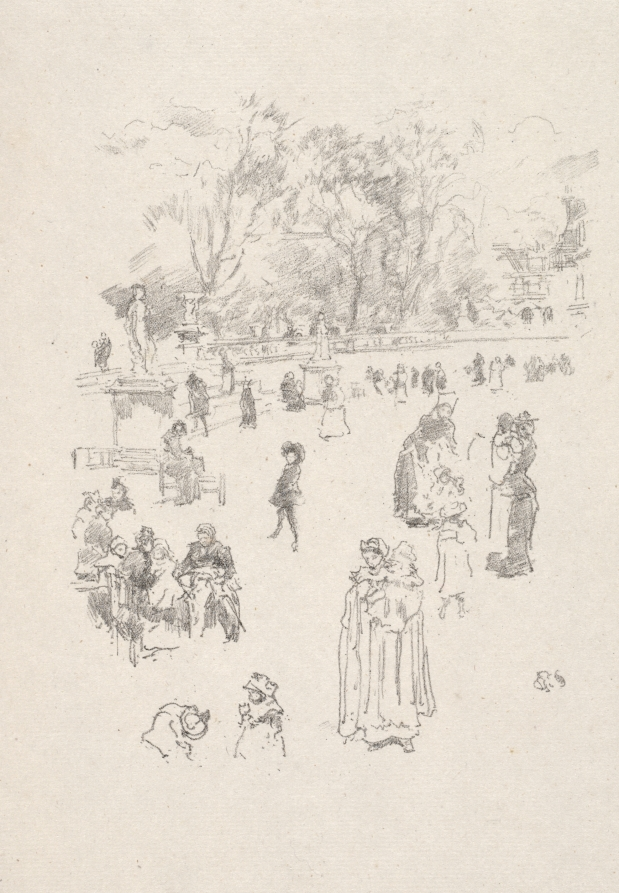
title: Nursemaids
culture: America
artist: James McNeill Whistler (American, 1834–1903)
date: 1894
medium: lithograph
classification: Print